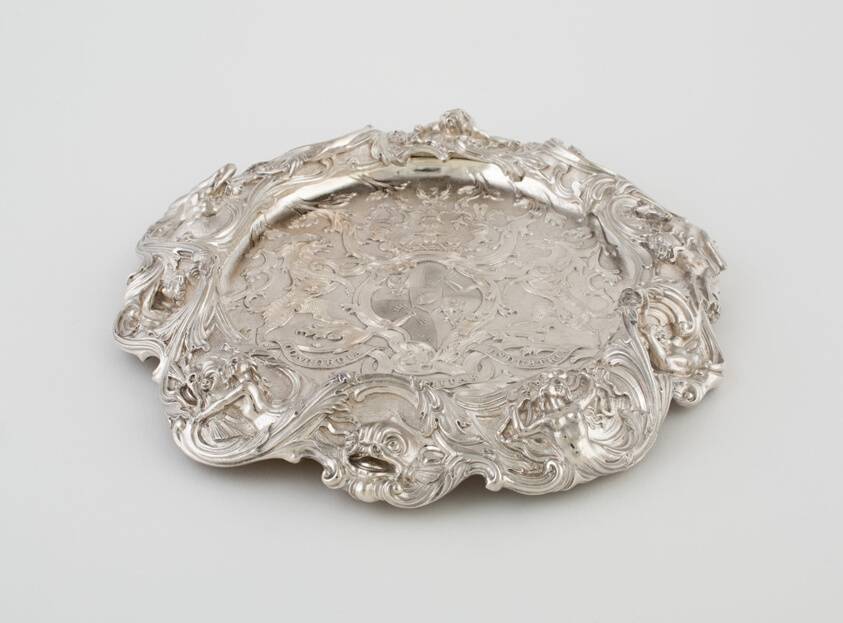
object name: Metalwork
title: Wine Bottle Cooler Stand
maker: Robert Garrard II; English, 1793–1881; London, England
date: 1845–46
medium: Silver on wooden support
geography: London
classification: silver; metalwork; european decorative arts